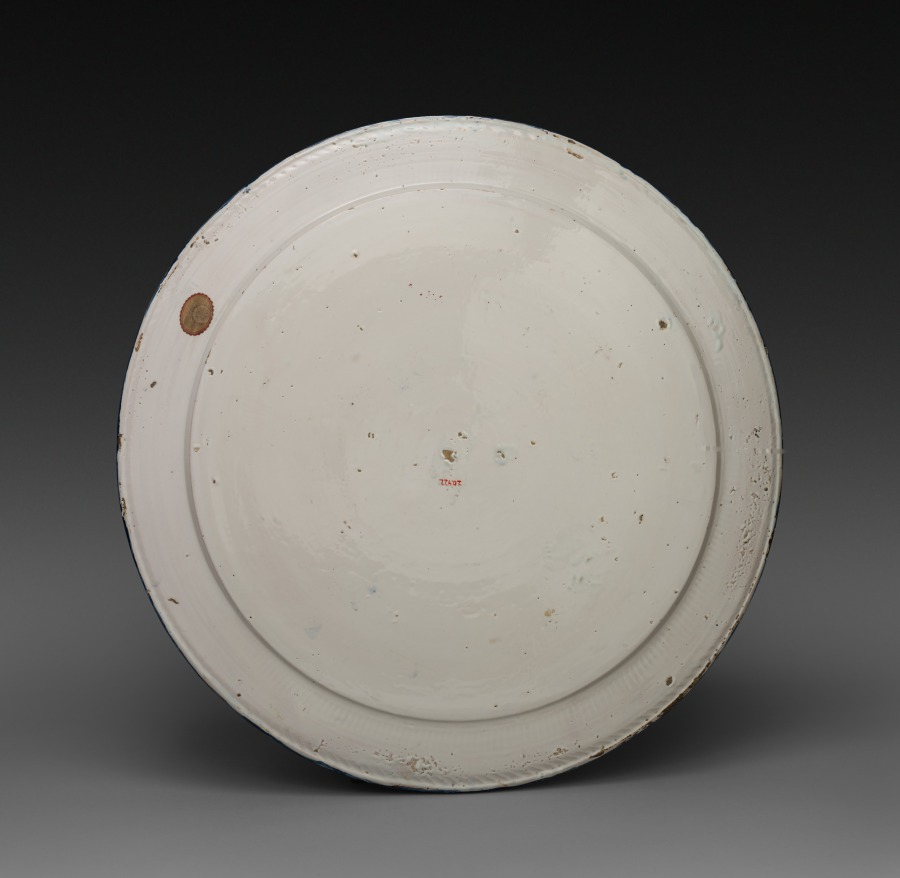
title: Plate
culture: Italy, Castelli, 18th century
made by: Liborius Grue (Italian, 1702–1776)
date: 1725–1775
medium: tin-glazed earthenware (maiolica)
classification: Ceramic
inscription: on front of plate: Polifemo L.G.P.; on back, signed: L.G.P(inxit).